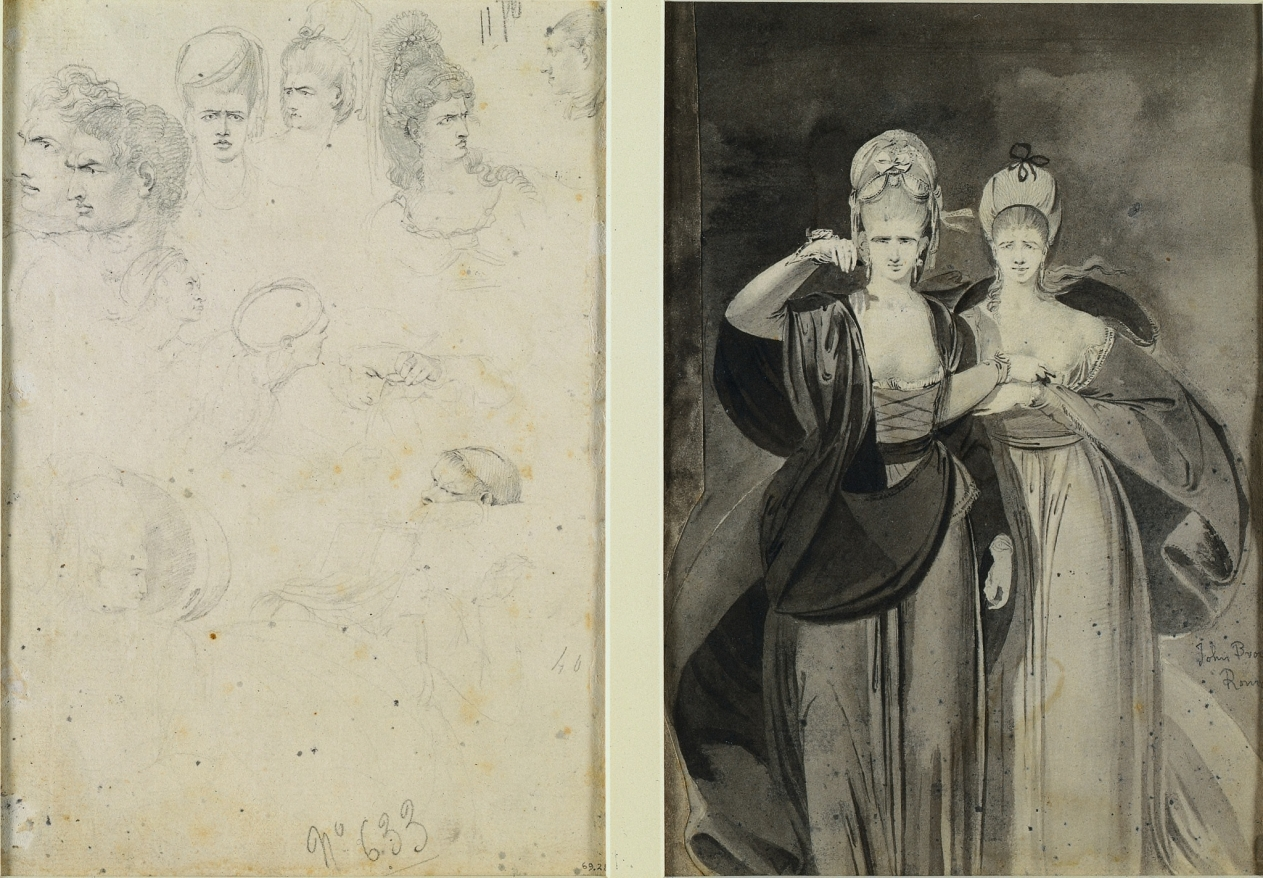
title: Sketches of Heads (verso, left); Two Women (verso, right)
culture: England, 18th century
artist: John Brown (British, 1752–1787)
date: c. 1770–75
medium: left: graphite; right: gray and black wash with point of brush and graphite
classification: Drawing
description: John Brown is known for a small group of monochromatic drawings imbued with sinister overtones. At the age of 20, the Scottish artist traveled to Italy where he spent the next 12 years. This drawing exemplifies his Roman street scenes which often depict women dressed in spectacular, billowing costumes. Here, a figure with bare ankles and plunging décolletage is surrounded by a crowd of men who leer at her. The reverse of the sketchbook sheet includes two independent drawings: a study of faces in fierce and intense expressions, and a pair of women wearing swirling gowns. One figure raises her hand in a mysterious gesture, either beckoning or forewarning the viewer.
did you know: John Brown meant for the dark background of this drawing to evoke the potential danger of Italian nights; the writer Johann Joachim Winckelmann had been murdered in Trieste in 1768, in the most conspicuous example of the period's widespread violence.